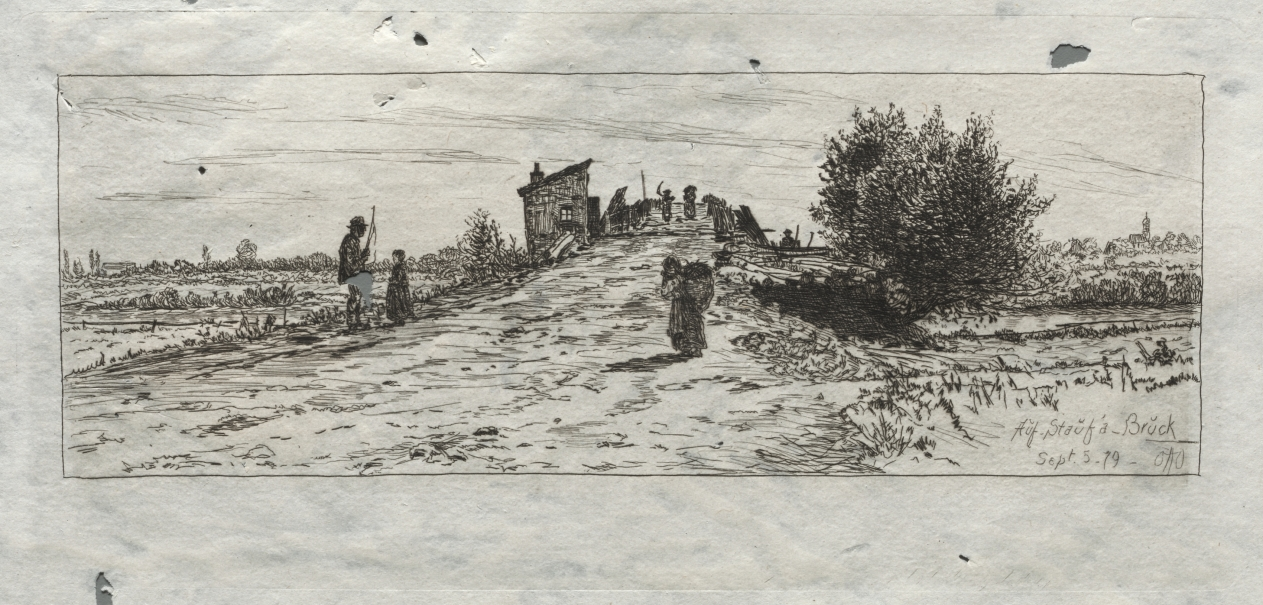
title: Auf Stauf a-Bruck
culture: America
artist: Otto H. Bacher (American, 1856–1909)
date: 1879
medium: etching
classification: Print